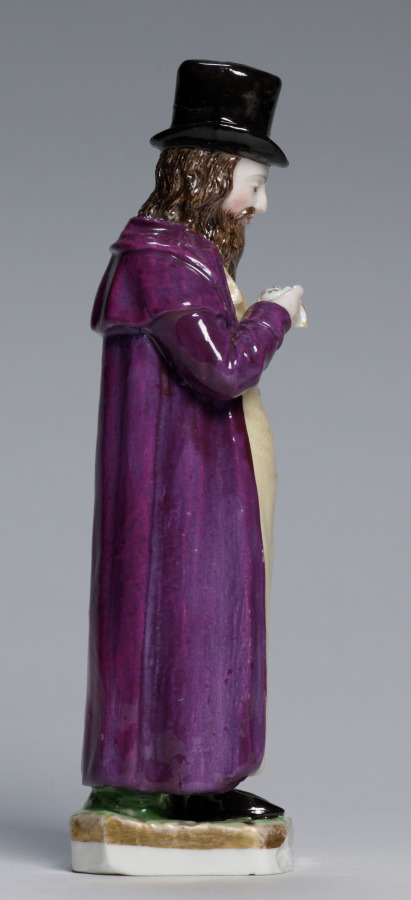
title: Man Holding a Watch (The Buyer)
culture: Russia, Moscow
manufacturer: Gardner Factory (Russian)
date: c. 1820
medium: porcelain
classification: Ceramic